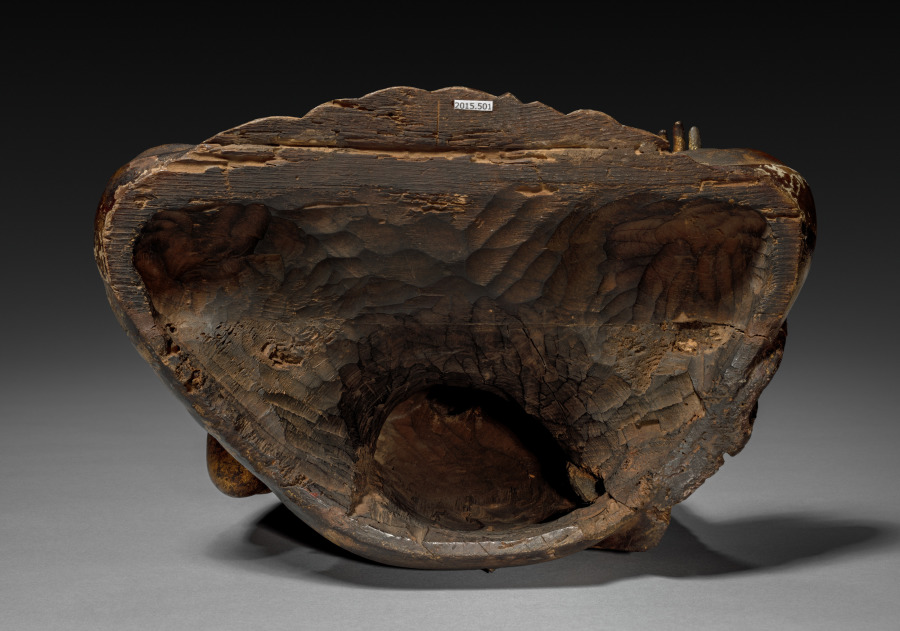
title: Shakyamuni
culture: Japan, Meiji period (1868–1912)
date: c. 1868–1912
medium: Wood with traces of lacquer and gilding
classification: Sculpture